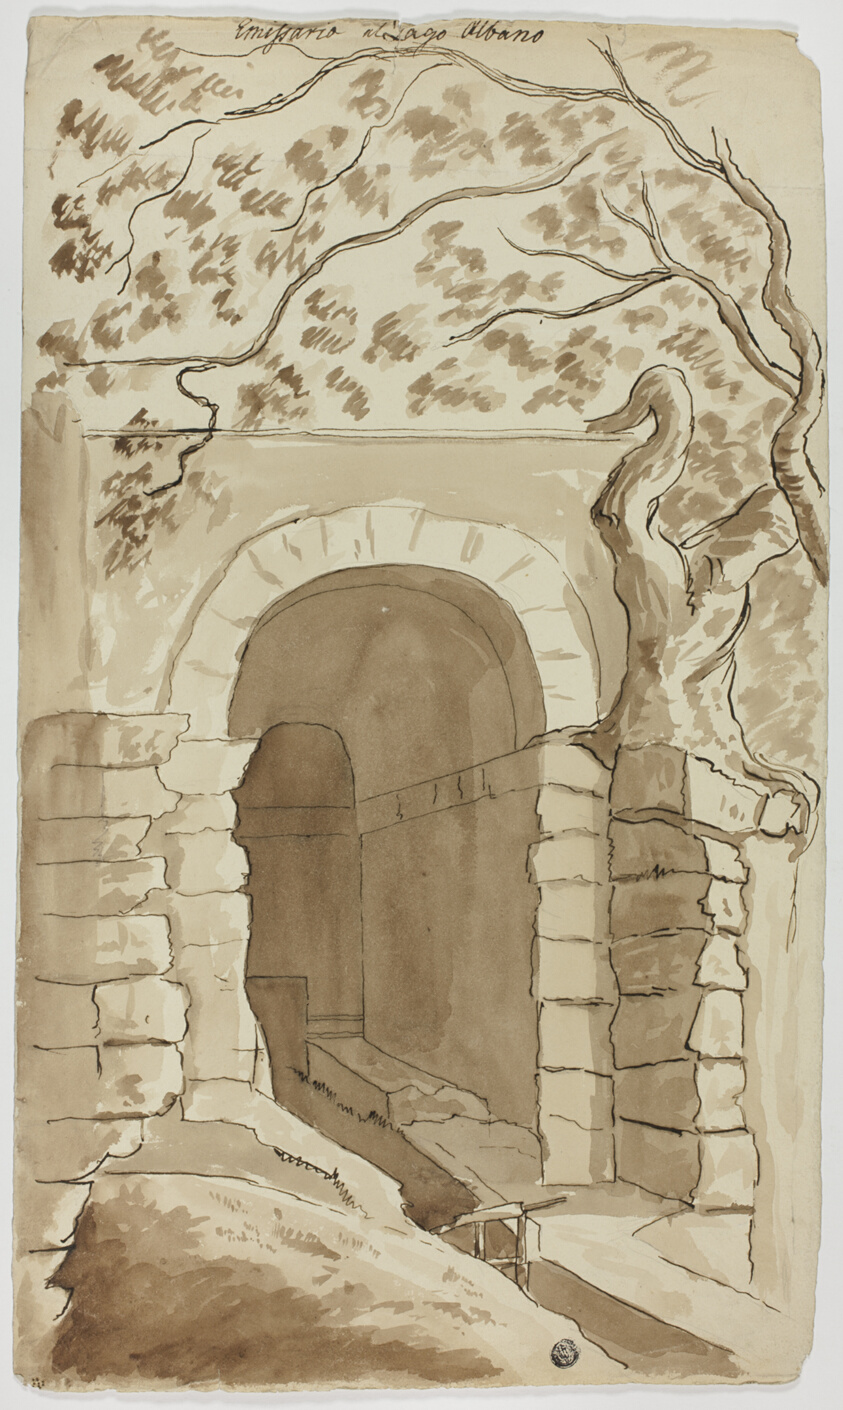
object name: Drawing and Watercolor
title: Effluent of Lake Albano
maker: Unknown Artist; Possibly Italian, 19th century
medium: Pen and brown ink and brush and brown wash, over graphite, on ivory wove paper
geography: Italy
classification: pen and ink drawings; paper; brush and wash; drawings (visual works); prints and drawing